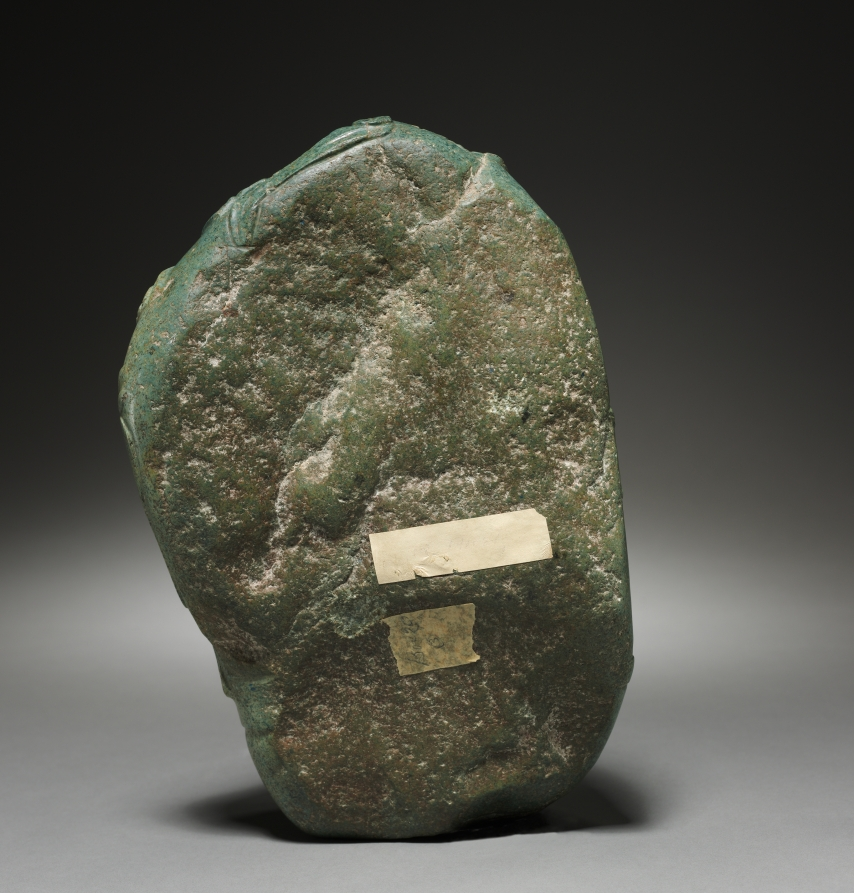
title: Tlaloc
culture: Central Mexico, Aztec, 13th-16th century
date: c. 1200–1519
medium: stone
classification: Sculpture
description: A natural cobble of greenstone has been smoothed and carved in low relief to portray the Aztec rain god Tlaloc, recognizable by his ringed eyes, twisted nose element, and fanged mouth. As the provider of water, Tlaloc is a patron of agriculture and holds a stalk of maize in one hand. To the Aztecs, Tlaloc was an ancient and civilized god; his worship could be traced back to the ancient ruined site Teotihuacan.